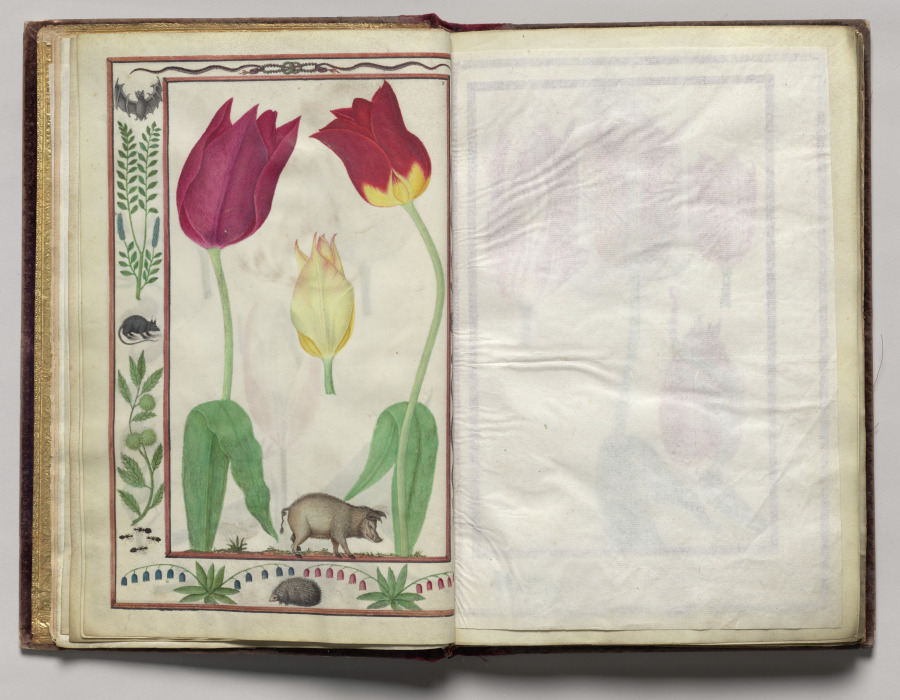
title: Tulips and Boar with Bat, Snake, Rat, and Ants Border, folio 4 (verso), from Florilegium (A Book of Flower Studies)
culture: France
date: 1608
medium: watercolor, ink, silver, and gold over occasional traces of pencil, on vellum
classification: Bound Volume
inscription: Dated: Poitiers 1608 (on frontispiece) Signed: On frontispiece in black ink, lower right: Van Kuyk Notation on drawing: Frontispiece: in pencil, lower margin: * élève de Van Kessel, peintre flammand (* in pencil also appears in front of Van Kuyk's name).